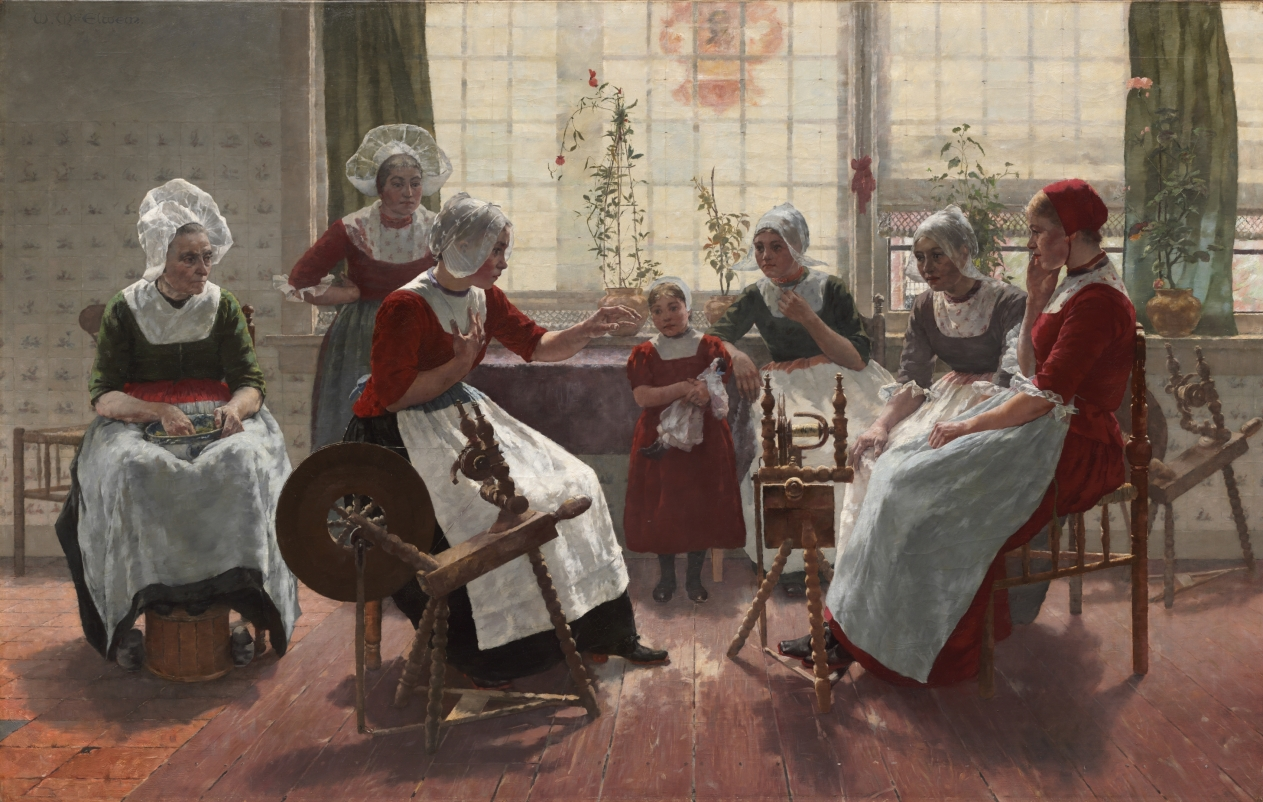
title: The Ghost Story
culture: America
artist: Walter MacEwen (American, 1860–1943)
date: 1887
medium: oil on canvas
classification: Painting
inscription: signed upper left: W. McEWEN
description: During the 1880s, the Netherlands became a magnet for several American artists, among them Walter MacEwen. His most famed painting, The Ghost Story, presents a group of individuals in a Dutch interior listening with rapt attention to spooky narration delivered by a woman at a spinning wheel. A young girl clutches her doll in fascination.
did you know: The women in this painting wear the traditional clothing of Volendam, a fishing village located in the province of North Holland.